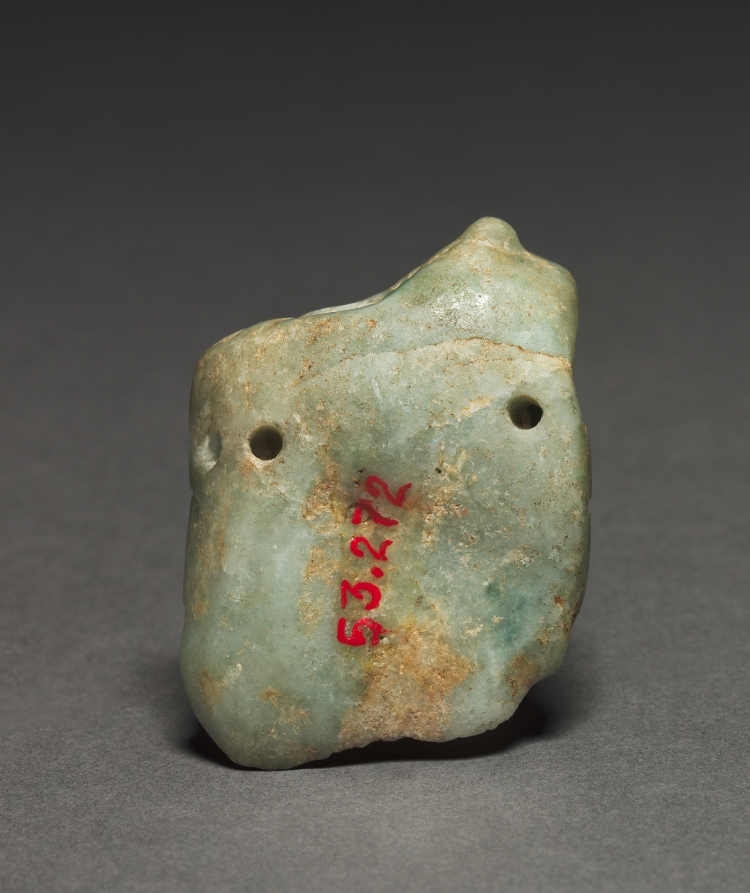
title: Pendant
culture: Maya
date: 250–900 CE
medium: jadeite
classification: Jade